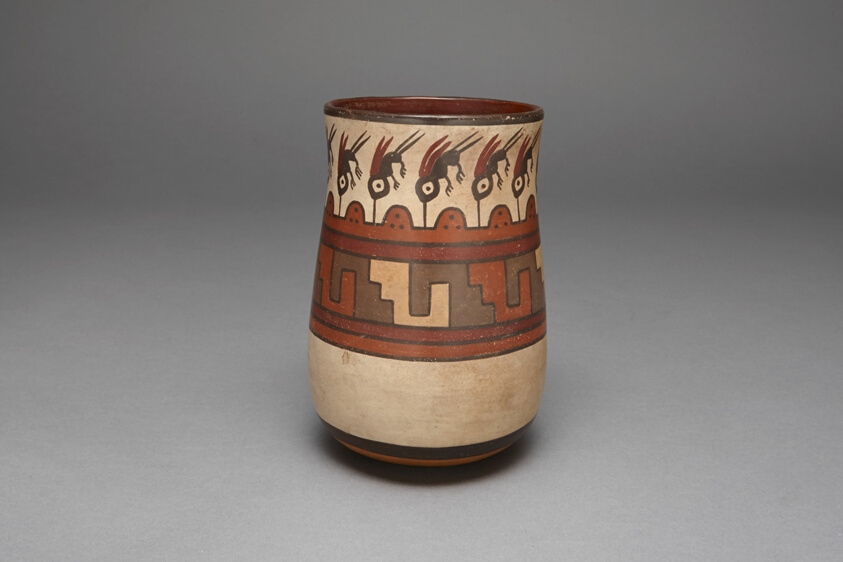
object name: Vessel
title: Beaker Depicting Abstract Hummingbirds or Insects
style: nazca, early intermediate period, Pre-Columbian, americas, Arts of the Americas, andean, andes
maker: Nazca; South coast, Peru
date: 180 BCE–500 CE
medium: Ceramic and pigment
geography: Peru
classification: earthenware; art of the americas; ceramics; vessel